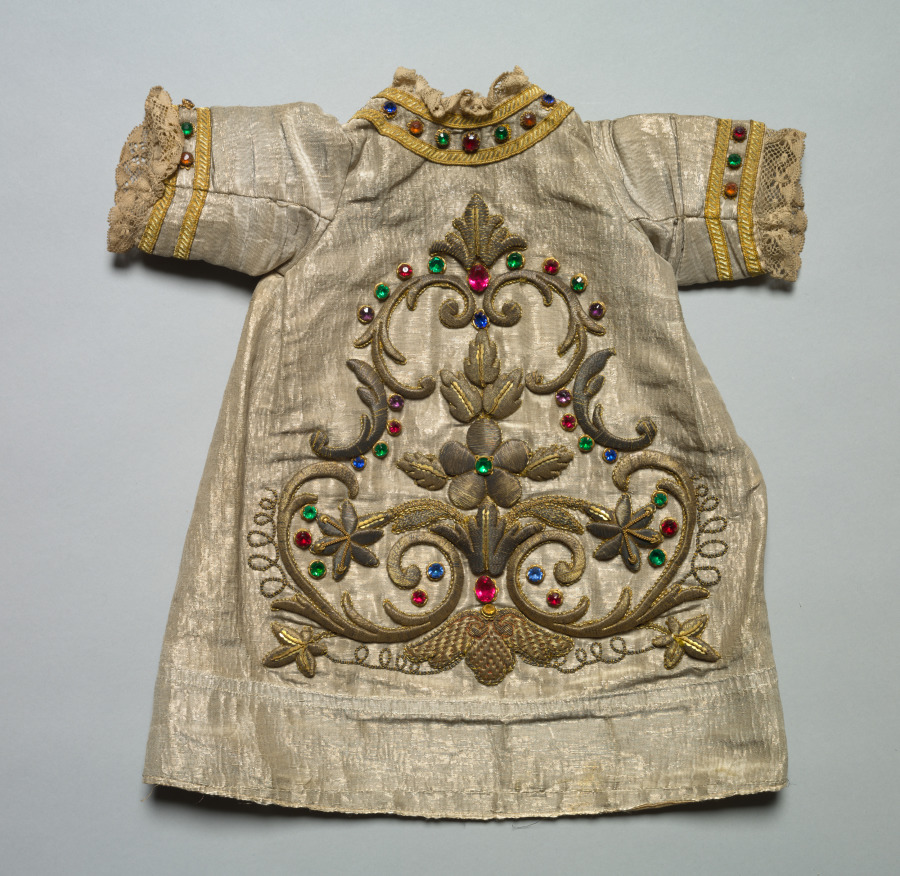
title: Baby's Robe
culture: Spain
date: 1600s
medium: plain weave silk with silver metal thread weft; embroidered with gold and silver metal thread, spangles, and colored glass stones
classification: Garment